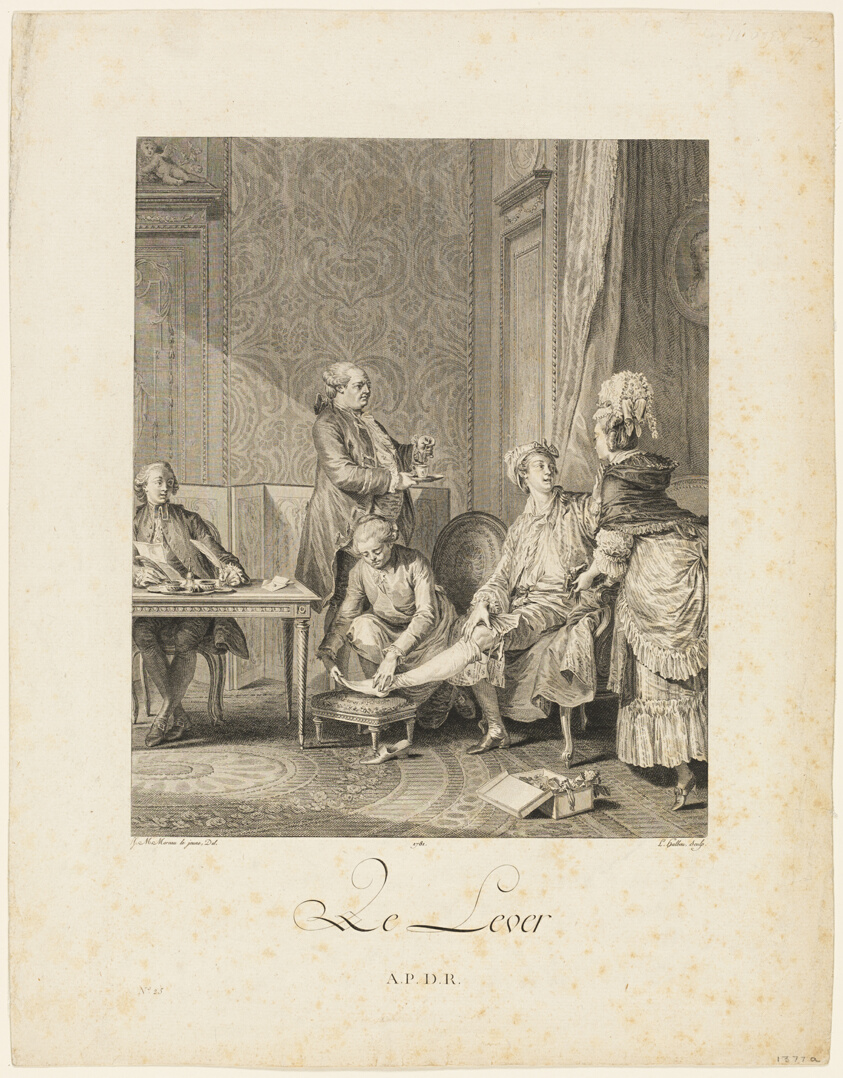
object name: Print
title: Rising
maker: Louis Michel Halbou (French, 1730-c. 1809); after Jean Michel Moreau (French, 1741-1814)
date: 1781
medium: Etching on paper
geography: France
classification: etching; print; prints and drawing